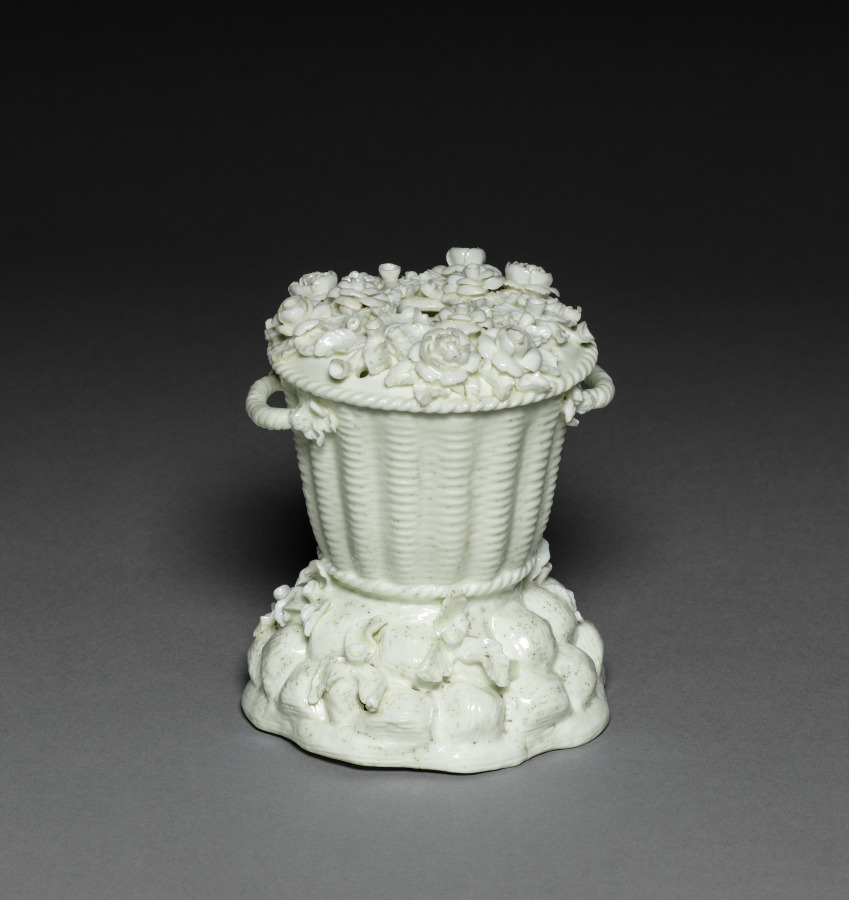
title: Potpourri Vase with Cover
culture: France, Saint Cloud, 18th century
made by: Saint Cloud Porcelain Factory (French)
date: c. 1740–60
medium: soft-paste porcelain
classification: Ceramic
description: These vases were created to contain potpourri, a mixture of flowers, herbs, and spices emitting ambient fragrance. This specific function offered a particularly fertile ground for the development of French porcelain, as manufactories experimented with forms, surface ornamentations, and placement of perforations.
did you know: Prior to Saint-Cloud's development of soft-paste porcelain in the 1690s, rumors spread throughout Europe that the prized material was made by burying a variety of materials, including lobster shells, in the ground for 80 years.